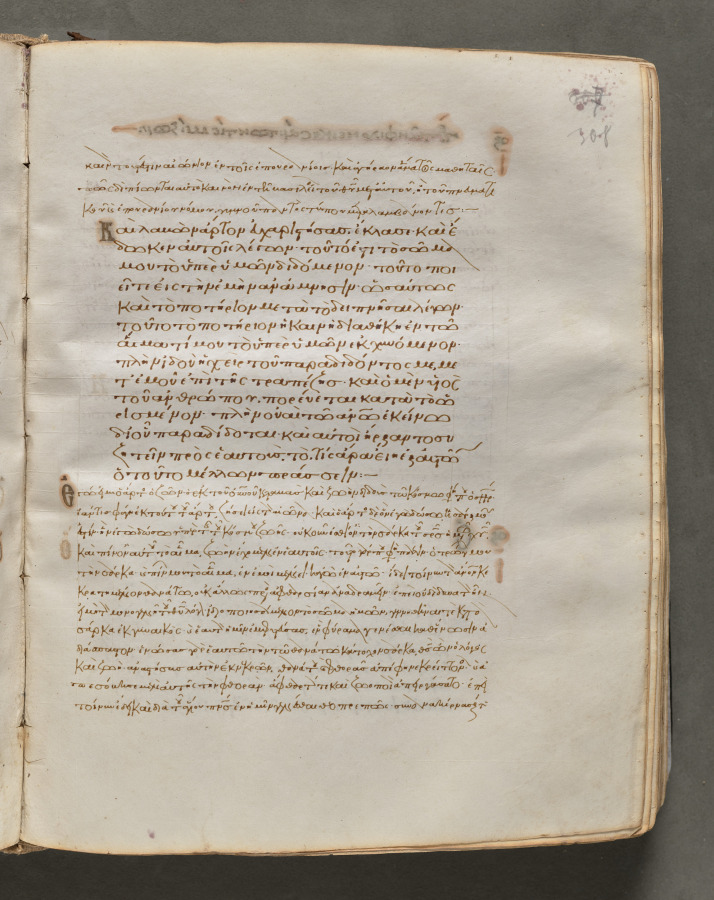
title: Text, folio 308 (recto), from a Gospel Book with Commentaries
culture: Byzantium, Constantinople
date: c. 1000–1100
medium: ink, tempera, and gold on vellum; leather binding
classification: Bound Volume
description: Each of the four gospels in this book opens on a page with brilliantly illuminated borders depicting the author of the text as well as birds—principally peacocks, symbols of the immortality of the soul—and fountains, representing the fountain of life and the salvation of the soul. This volume consists of 428 leaves with texts in Greek. Its level of sophistication suggests that it was probably written and decorated in a monastery in Constantinople.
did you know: Gospel books were carried in procession through Byzantine churches.